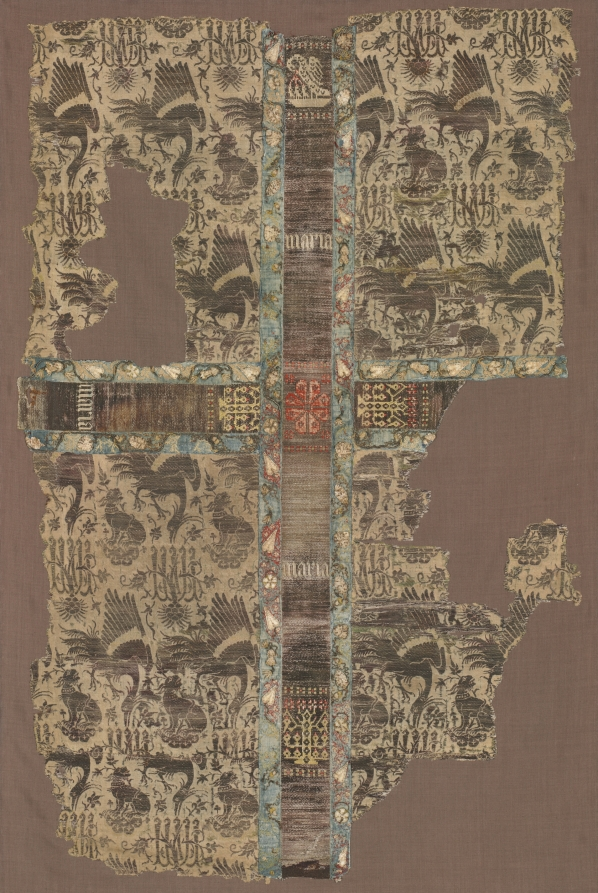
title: Fragmentary Chasuble with Woven Orphrey Band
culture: Italy (Chasuble) and Germany (Orphrey)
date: 1300s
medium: Silk and gold thread, lampas weave; embroidered orphrey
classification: Textile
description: The second half of the 1300s was one of the great periods of Italian silk design. Drawing upon Chinese, Islamic, and European motifs, artists created international designs. This rare, fragmentary chasuble displays a Chinese phoenix with outstretched wings flying toward a group of pseudo-Kufic, Arabic-like letters while a dog snarls at the bird. Arabic script was associated with the Holy Land. Italian textiles were an important export product at the end of the Middle Ages. In this case, the fabric was shipped to Germany, where it was used to create a chasuble, the upper garment of the bishop and priest during Holy Mass.